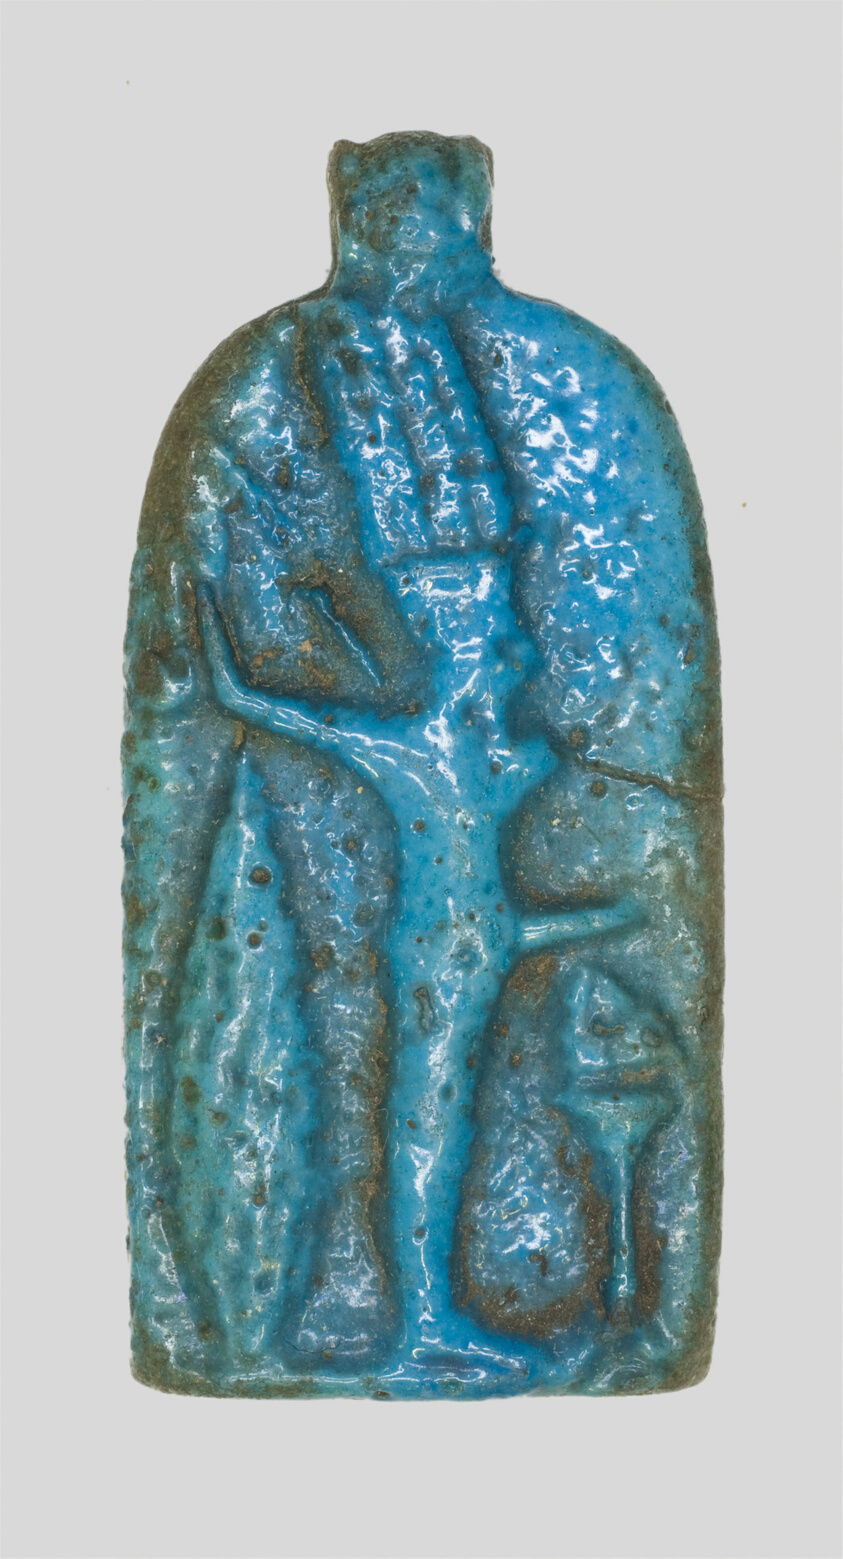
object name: Costume and Accessories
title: Amulet of the God Amun-Ra Kamutef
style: egyptian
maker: Egyptian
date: Late Period, Dynasty 26–31 (664–332 BCE)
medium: Faience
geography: Egypt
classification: amulet; jewelry; ceramics; ancient art; costume; faïence (composite material)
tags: gods (deities)